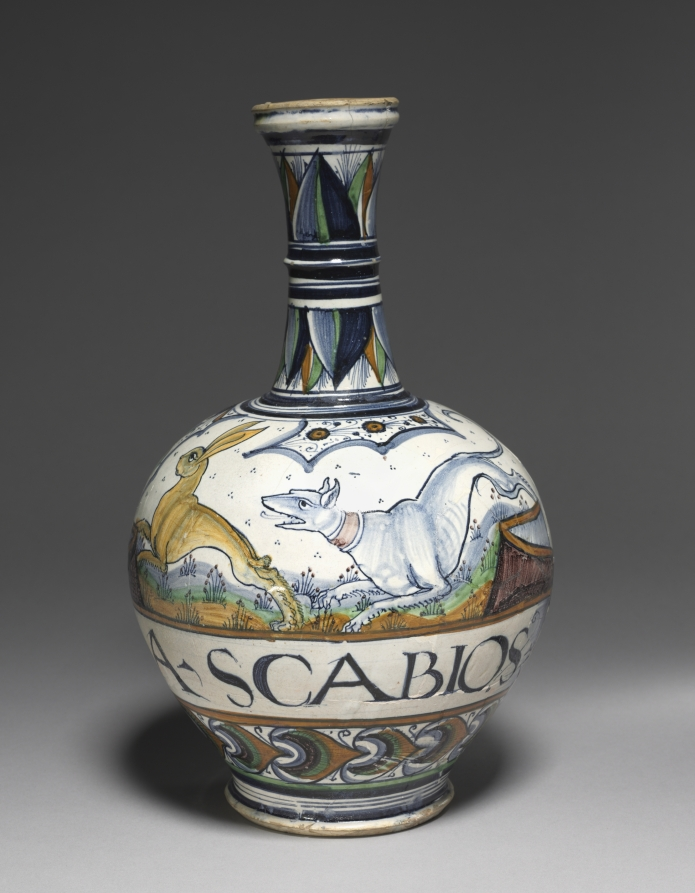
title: Pharmacy Bottle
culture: Italy, Papal States, Faenza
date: c. 1500–1510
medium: tin-glazed earthenware (maiolica)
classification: Ceramic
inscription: written in lower ribbon band: A. SCABIOS.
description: Pharmacy bottles that lined the shelves of Renaissance pharmacies often held medicinal herbs, spices, and ointments. The inscription on this bottle reads SCABIOS, or “scabious water,” which may refer to a teasel root compound that was used to clean and decontaminate velvet.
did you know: During the Renaissance, aristocrats tested the speed and agility of their greyhounds in a sport called "hare coursing."